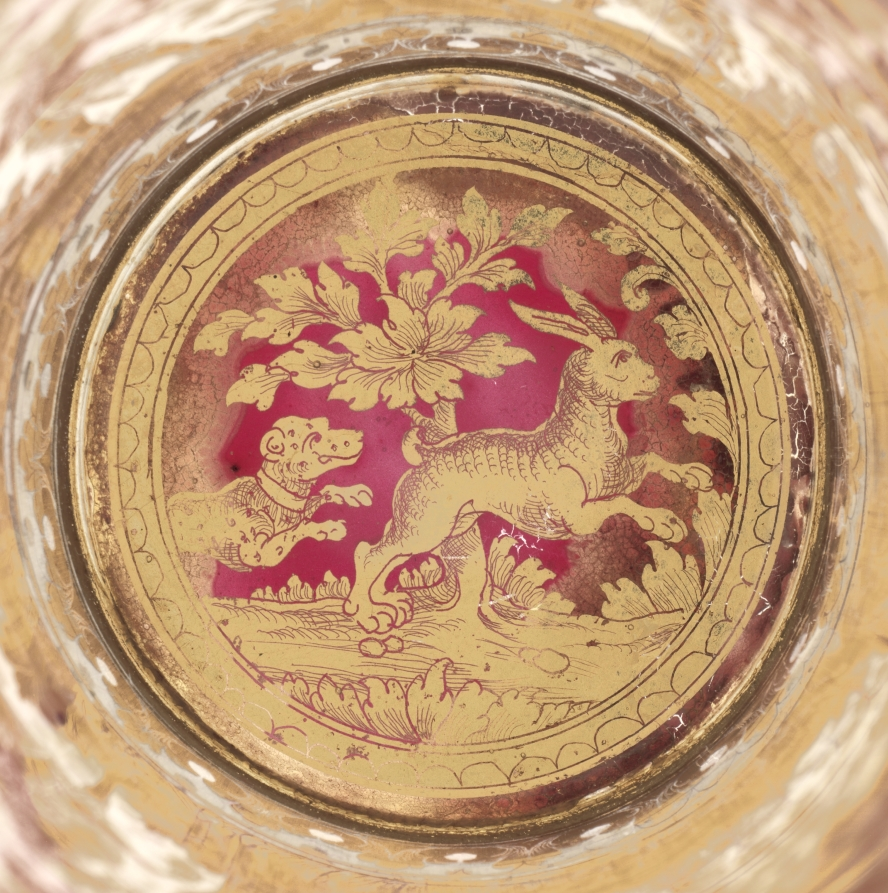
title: Tumbler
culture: Bohemia, 18th century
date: c. 1730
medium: zwischengoldglas (glass)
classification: Glass